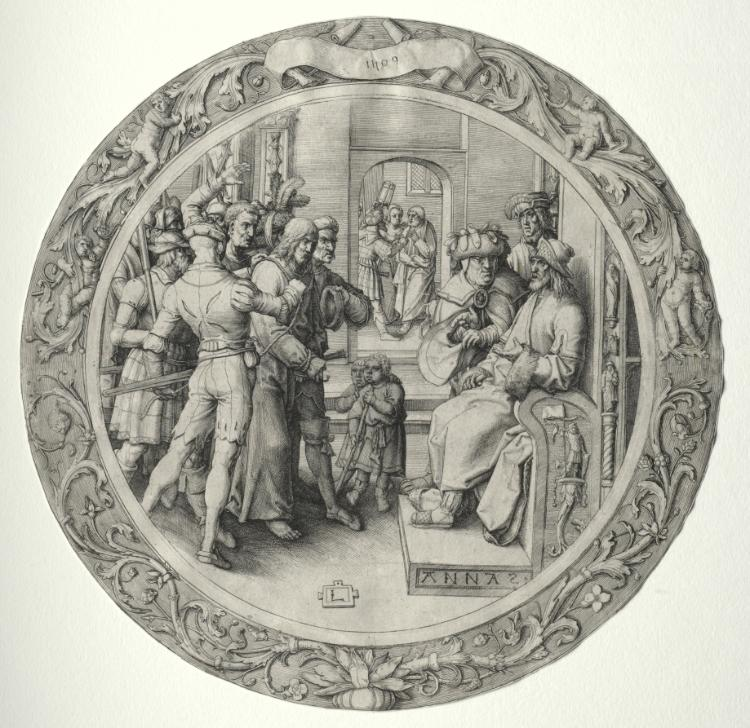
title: The Round Passion: Christ before the High Priest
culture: Netherlands, 16th century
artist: Lucas van Leyden (Netherlandish, 1494–about 1533)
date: 1509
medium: engraving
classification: Print